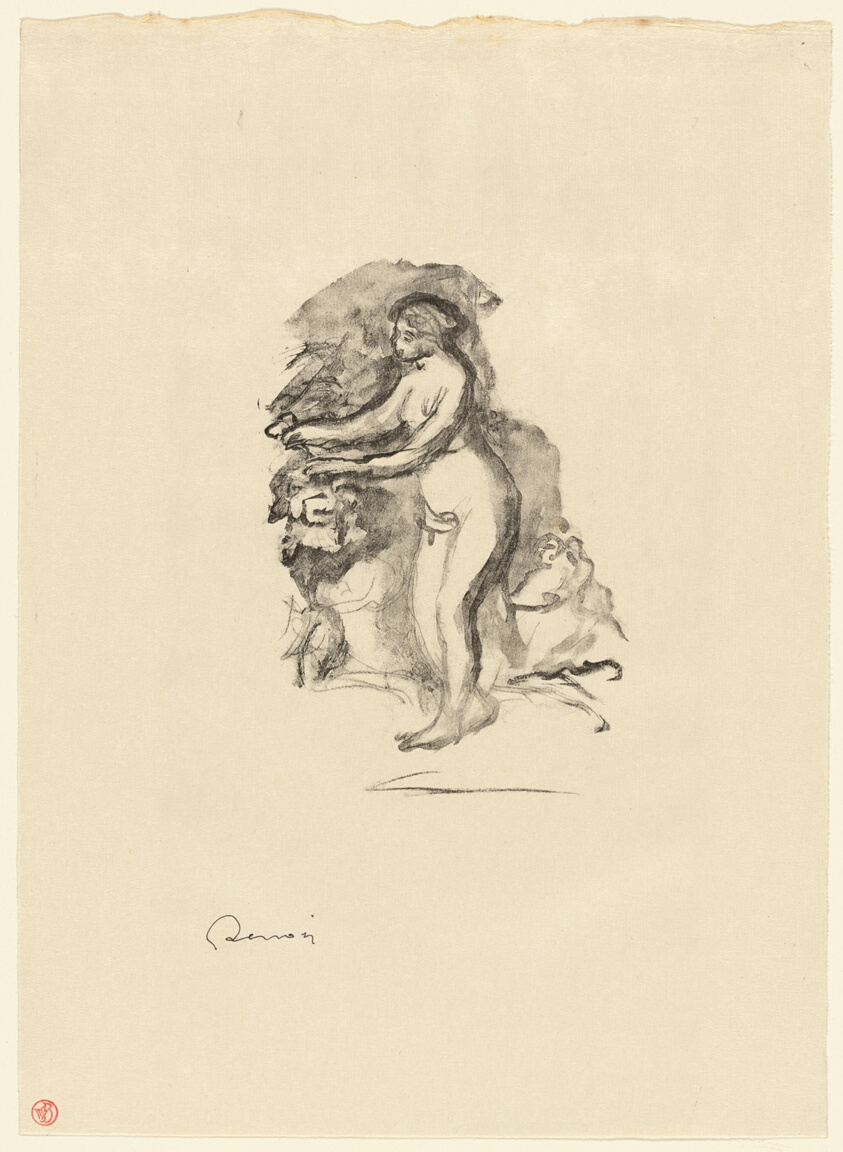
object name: Print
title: Woman with Grapevine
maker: Pierre Auguste Renoir (French, 1841-1919); printed by Auguste Clot (French, 1858-1936); published by Ambroise Vollard (French, 1835-1939)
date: c. 1904, published 1919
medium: Lithograph in black on cream Japanese paper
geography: France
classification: lithograph; print; prints and drawing